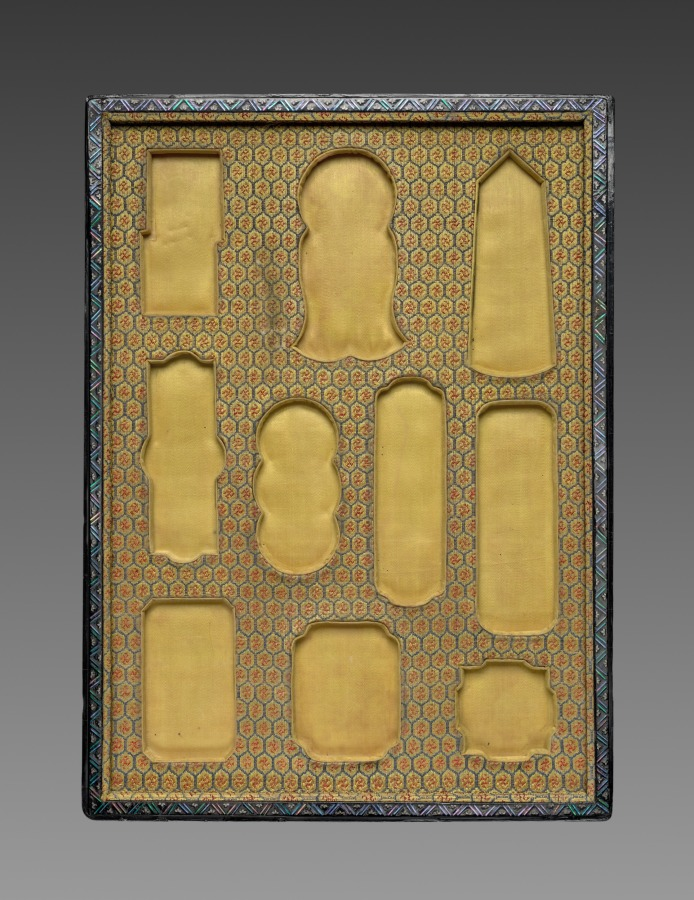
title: Imperially Commissioned Set of Ink Sticks with Images and Poems of Famous West Lake Sites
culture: China, Qing dynasty (1644–1911), Qianlong reign (1736–95)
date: 1780–94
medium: Molded ink in yellow, blue, black, green, red, brown, white, and gold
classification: Miscellaneous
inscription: 乾隆年製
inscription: The inscription in mother of pearl inlay on the box’s cover says: Imperially Made Gold Inscribed Poems of Images of [the Ten] Sights of the Westlake.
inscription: The poems on the ink sticks are published in Yuzhi shiji 御製詩集 [Collection of imperial poetry], vol. 4, juan 71, 6b–8b; and Qinding nanzun shengdian 欽定南巡盛典 [Grand ritual of the southern tour], juan 17, 17b–28b.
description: Each ink stick depicts one of the Ten Scenes of the West Lake on one side, and a corresponding imperial poem on the other, composed on emperor Qianlong’s fifth southern inspection tour in 1780. Notably, the ink sticks’ colors and shapes correspond with the poems’ respective content. An inscription on one ink stick identifies this set as a gift to the emperor by Jiang Lan, an official from Anhui, a province known for its excellence in ink, paper making, and printing. Imperial records note that 10 more sets of West Lake inks were presented as a tribute by Gioroi Giking (Chinese: Jueluo Jiqing, 1753–1802), a Zhejiang provincial governor and a bannerman (Manchu native).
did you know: The inscription in mother-of-pearl inlay on the box’s cover says: Imperially Made Gold Inscribed Poems of Images of [the Ten] Sights of the Westlake.